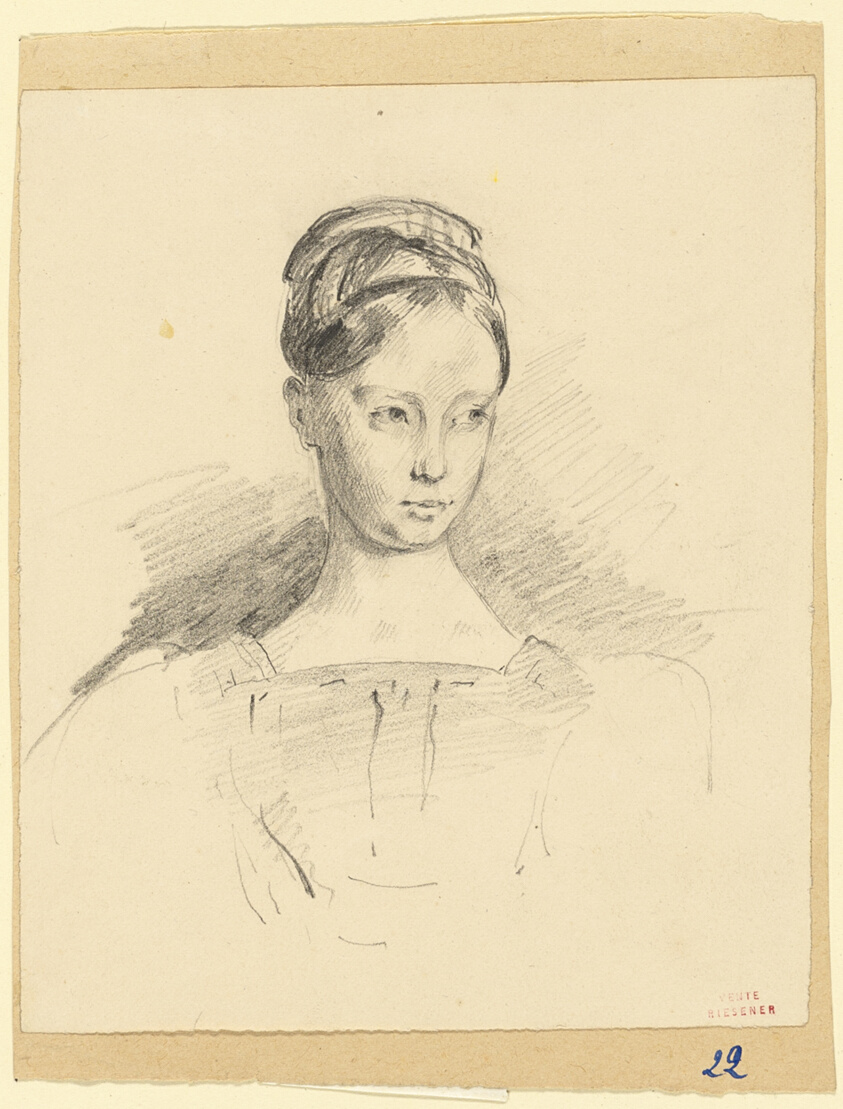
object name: Drawing and Watercolor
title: Celeste Richomme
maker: Louis Antoine Léon Riesener (French, 1808-1878)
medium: Graphite, on ivory wove paper, tipped on tan wove paper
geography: France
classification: graphite; drawings (visual works); prints and drawing